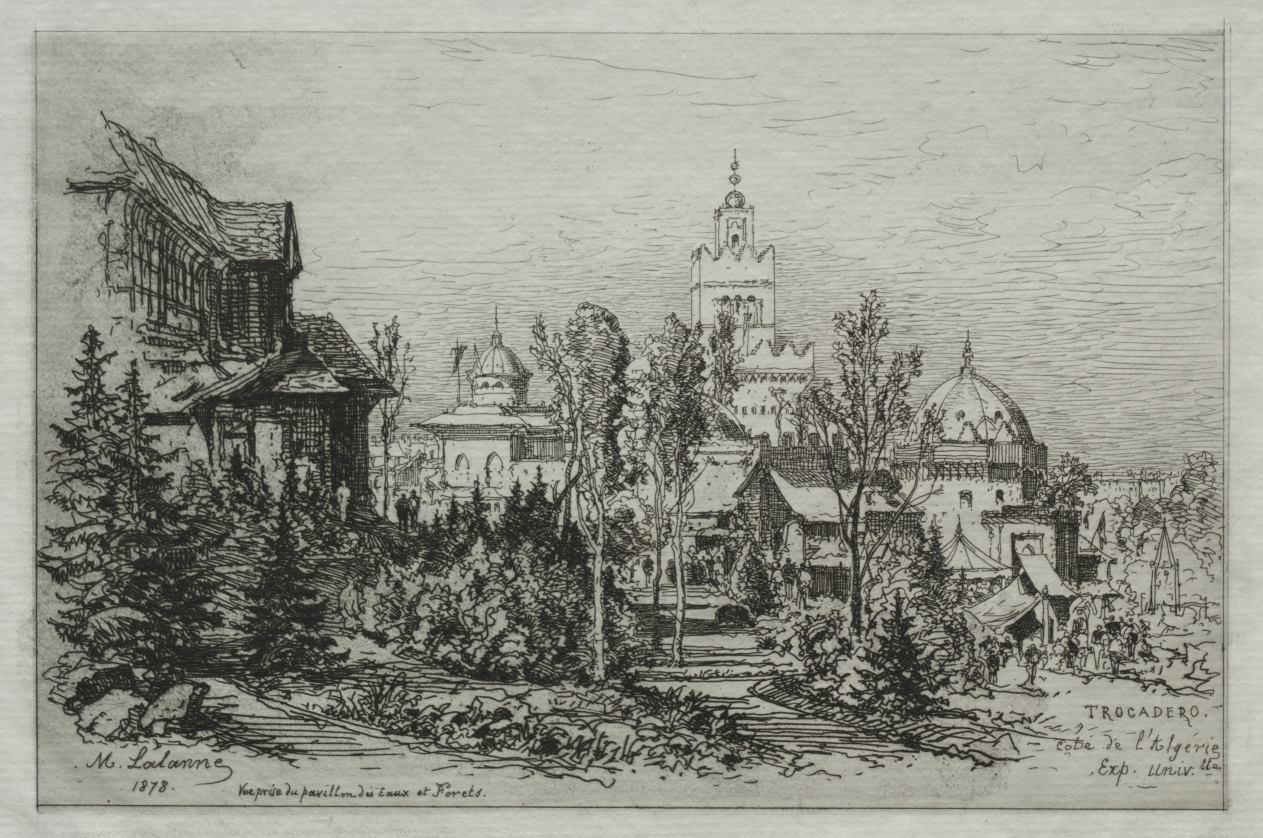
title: The Algerian Palace at the Trocadero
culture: France, 19th century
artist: Maxime Lalanne (French, 1827–1886)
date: 1878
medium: etching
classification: Print